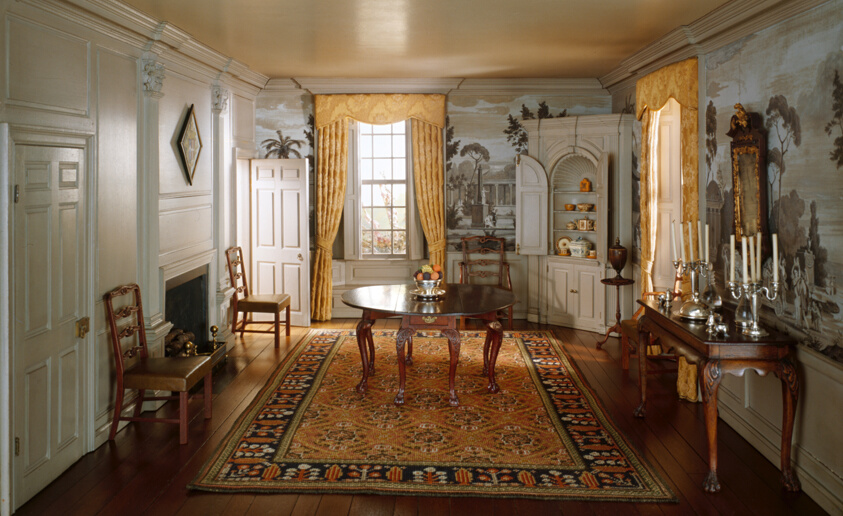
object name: Miniature room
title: A6: New Hampshire Dining Room, 1760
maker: Designed by Narcissa Niblack Thorne; American, 1882-1966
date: c. 1940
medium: Miniature room, mixed media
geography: United States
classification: miniature; thorne rooms